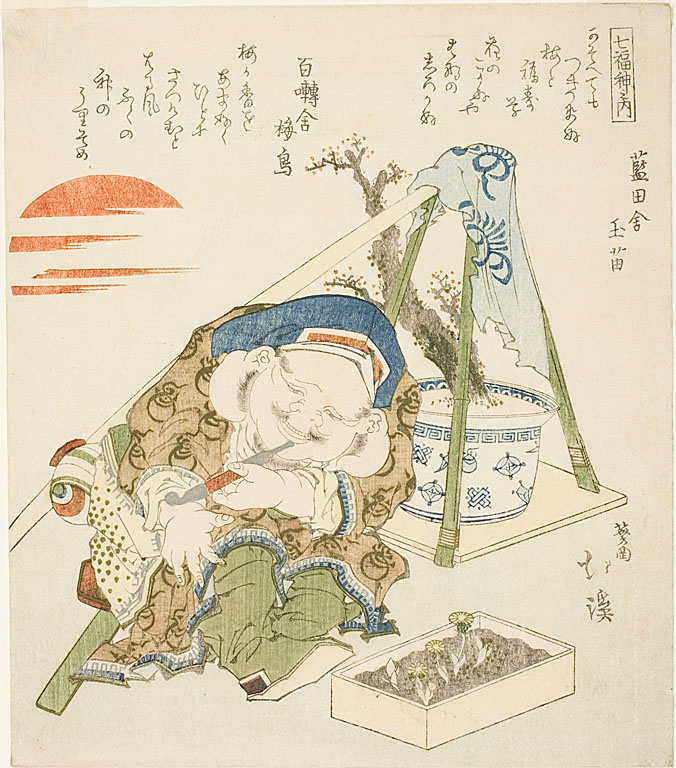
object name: Print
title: Daikoku, from the series of "Seven Gods of Luck (Shichi fuku jin no uchi)"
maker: Totoya Hokkei (Japanese, 1780-1850)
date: early 19th century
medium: Color woodblock print; surimono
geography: Japan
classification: woodblock print; print; asian art